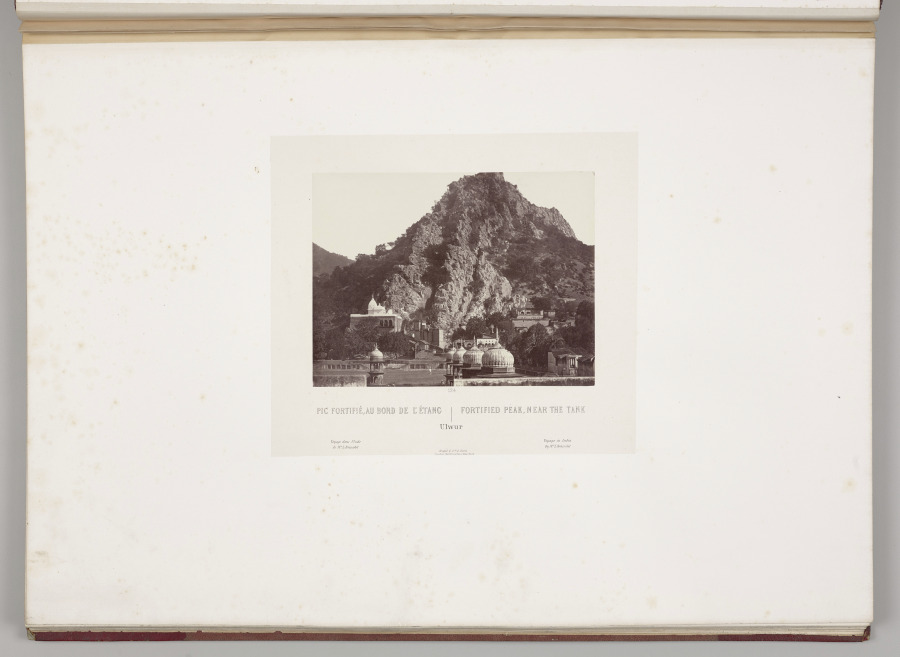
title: Fortified Peak, Near the Tank, Ulwur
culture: France, 19th century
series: India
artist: Louis-Théophile Marie Rousselet (French, 1845–1929)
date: 1865–68, published 1869–70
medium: Albumen print from glass plate negative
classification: Photograph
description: Concerned that his drawings did not do justice to the splendor of India’s monuments, Rousselet learned photography in India that year, a remarkable accomplishment. He proved to be a talented photographer with a sophisticated sense of composition. The scenes in this volume sweep across sites of Sultanate, Rajput, and Mughal power in northern India, from the sacred Hindu city of Varanasi on the Ganges River to Alwar in Rajasthan. Also included are several scenes of industry and portraits of Indian rulers.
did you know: Louis Rousselet described himself as a “scientific traveler” when he went to India alone at age 18 in 1863 and stayed into 1868.